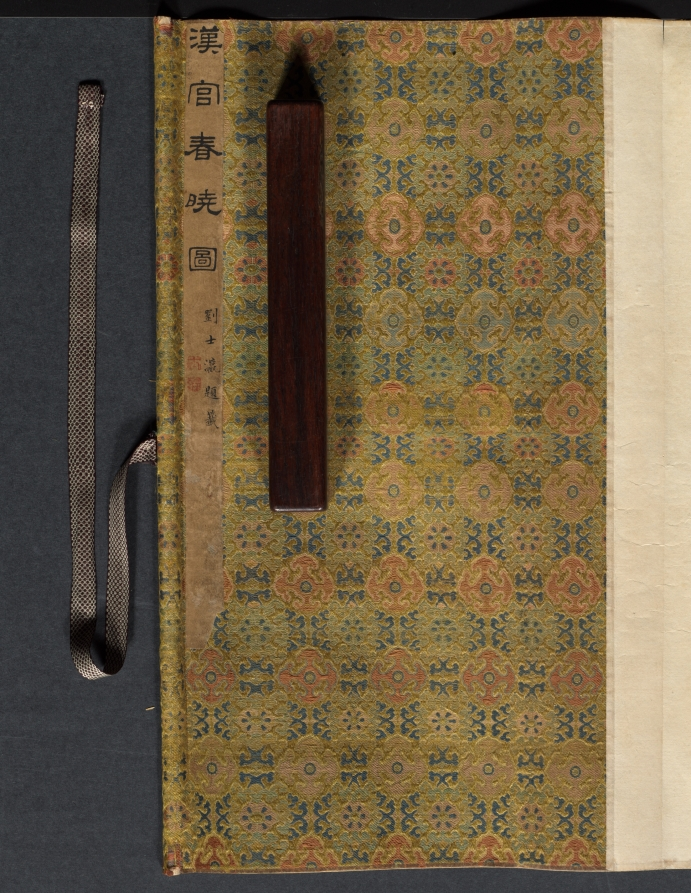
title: Palace Ladies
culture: China, Qing dynasty (1644-1911)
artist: copy after Qiu Ying (Chinese, 1494–1552)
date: 1644–1911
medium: handscroll, ink and color on silk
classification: Painting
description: This handscroll illustrates the pursuits of court ladies in a palace precinct on a spring day. Women, young girls, and their maids amuse themselves by sitting on a swing, playing games, watering and admiring peonies, performing music together, playing the qin (zither), feeding a parrot on the balustrade and fish in the water, or catching butterflies. The life of elite women was mostly restricted to the so-called inner quarters, meaning the garden and inner courts of the house. This painting idealizes the world of young palace girls that in fact was often filled with boredom and waiting for a lover.